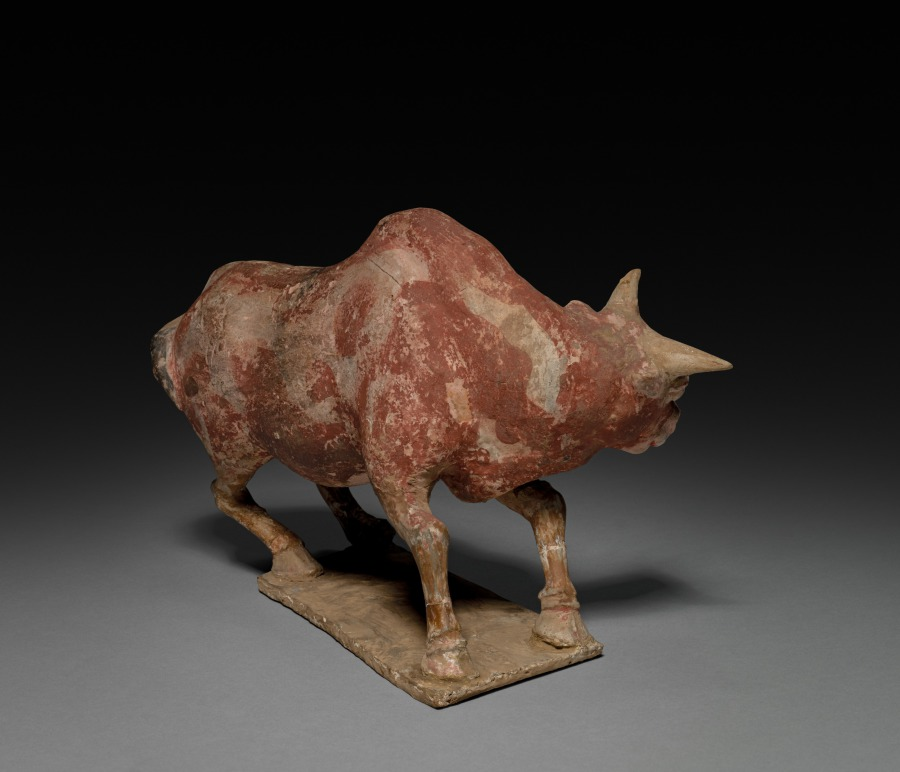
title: Bull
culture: China, Tang dynasty (618–907)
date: 618–907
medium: painted earthenware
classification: Ceramic